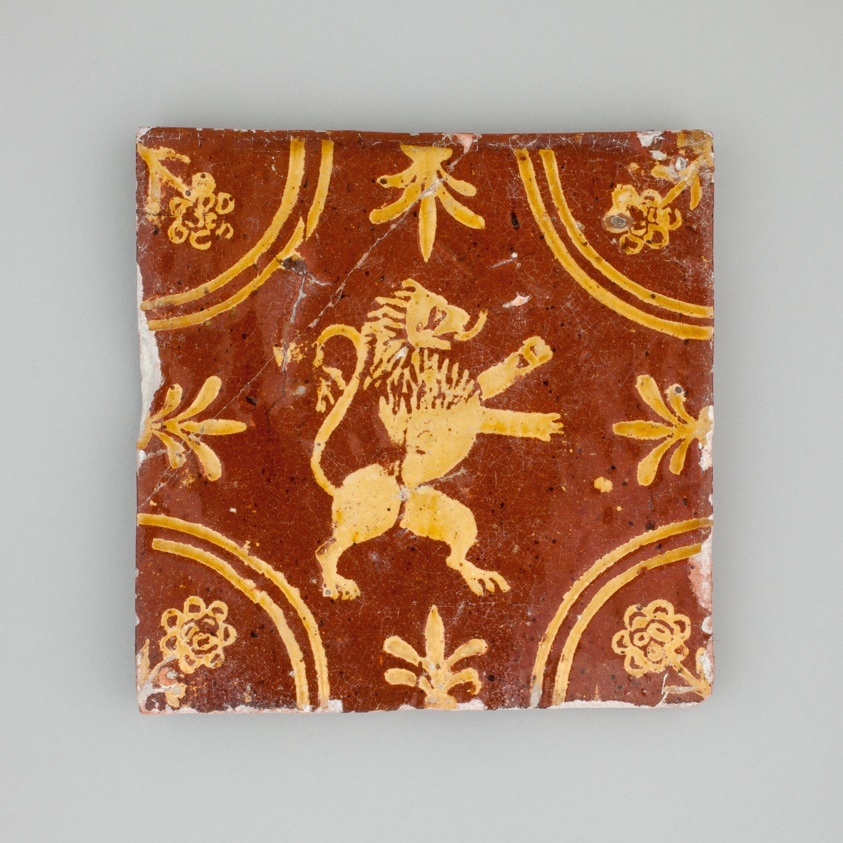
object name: Ceramics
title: Tile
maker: Dutch, Limburg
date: 1575/1600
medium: Earthenware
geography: Limburg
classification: earthenware; ceramics; european decorative arts; decorative arts